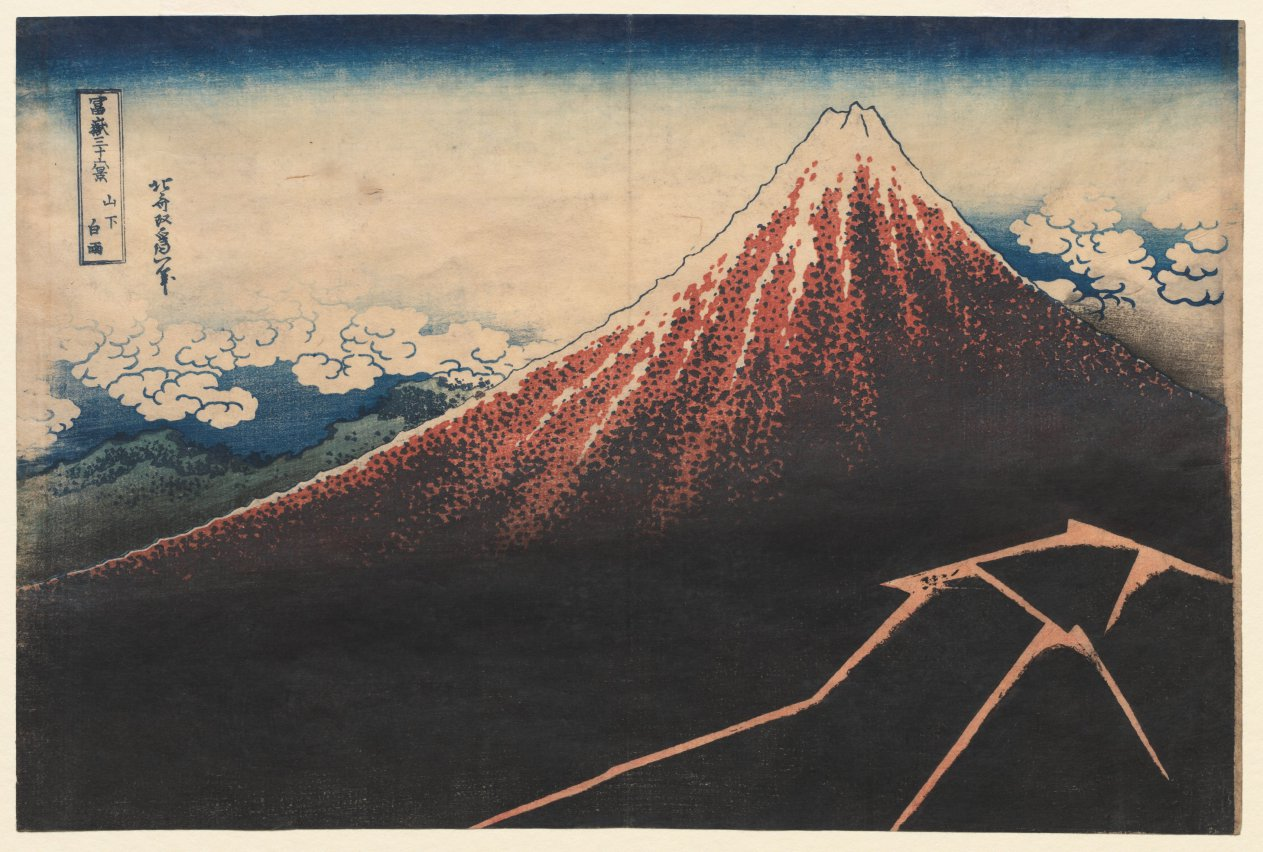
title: Rain Below the Mountain (from the series Thirty-six Views of Mt. Fuji)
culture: Japan, Edo period (1615–1868)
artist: Katsushika Hokusai (Japanese, 1760–1849)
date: early 1830s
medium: color woodblock print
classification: Print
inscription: Signature: Hokusai aratame Iitsu hitsu.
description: Hokusai probably composed this print as a complement to Mt. Fuji in Clear Weather (see CMA 1930.189) and to illustrate the mountain’s majesty in different weather. Here, a sudden shower covers most of the mountain’s base and slope with dark clouds.